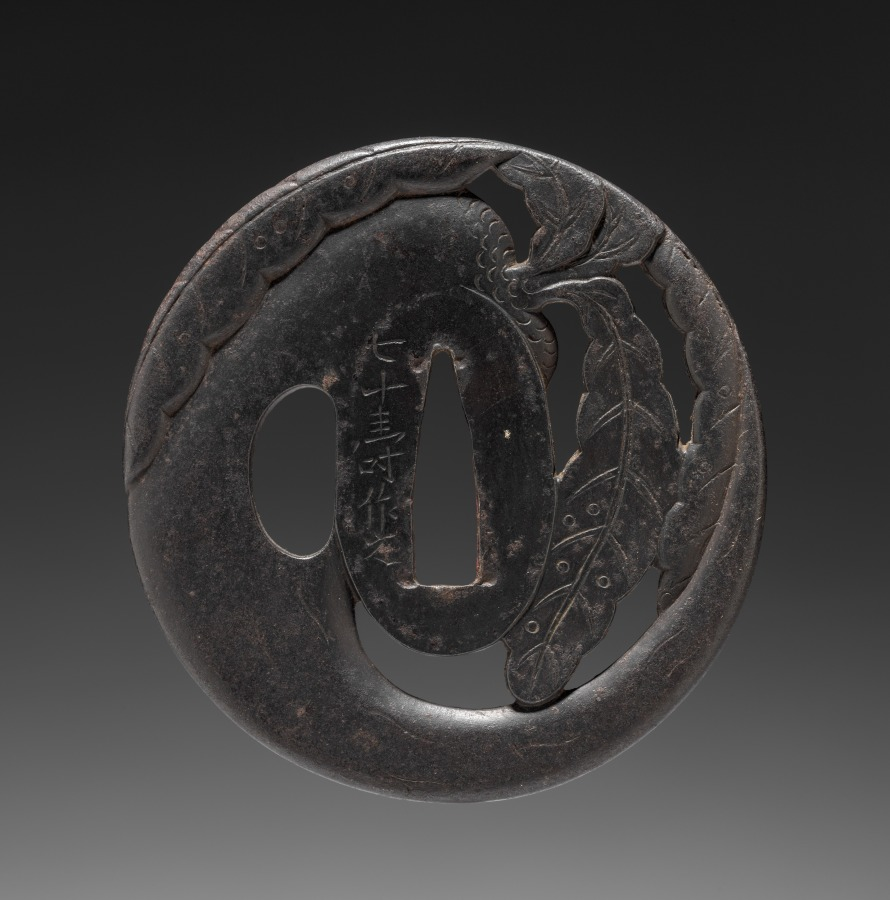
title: Sword Guard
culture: Japan, Edo period (1615–1868)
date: early 1800s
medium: iron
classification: Arms and Armor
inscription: signed "Toshiuji, residing in Tosa province."